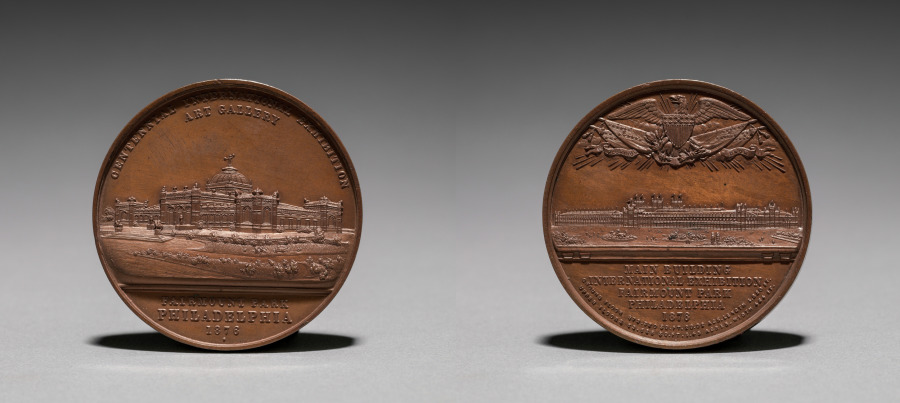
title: Medal: Commemorating the Centennial International Exhibition, 1876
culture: America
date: 1876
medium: bronze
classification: Metalwork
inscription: Centennial International Exhibition Art Gallery - Fairmont Park Philadelphia, 1876.